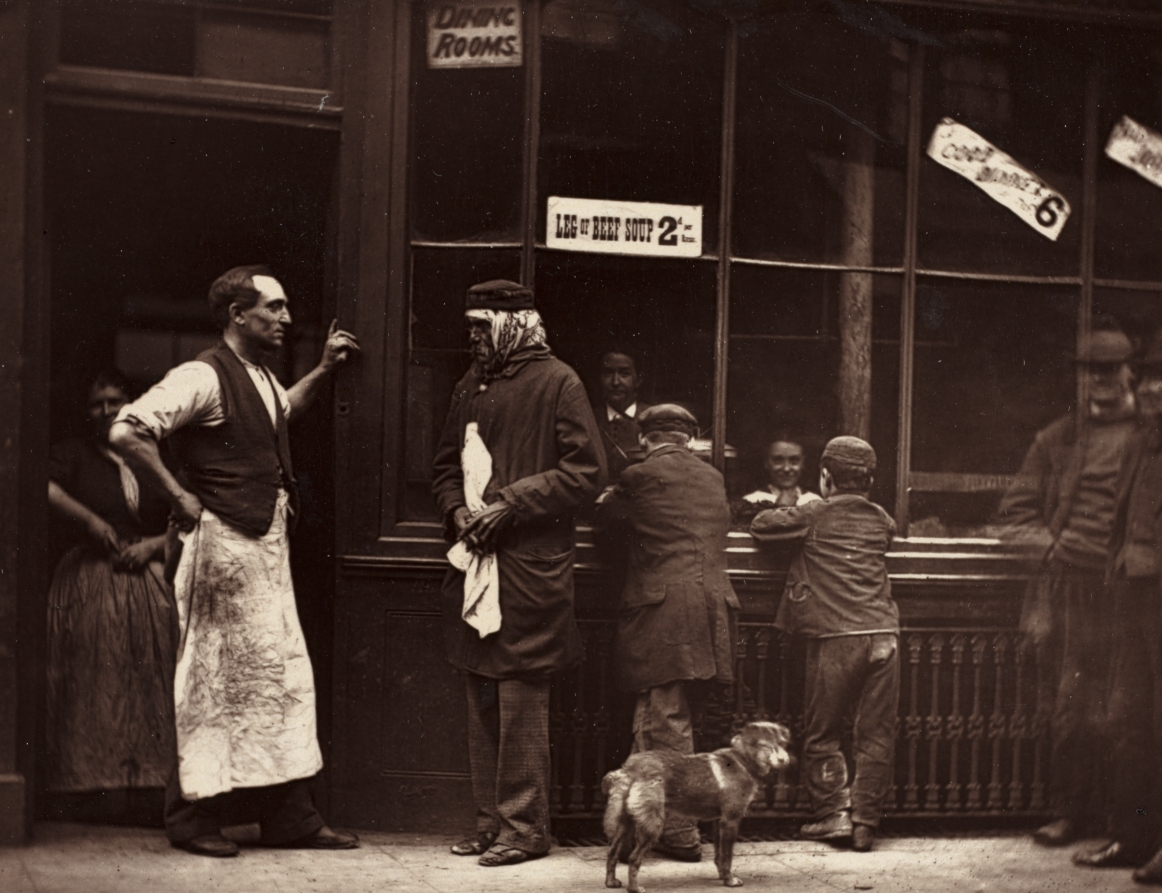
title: A Convict's Home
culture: England, 19th century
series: Street Life in London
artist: John Thomson (Scottish, 1837–1921)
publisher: Sampson Low, Marston, Searle and Rivington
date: 1876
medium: woodburytype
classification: Photograph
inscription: Written in pencil on recto: "300"; in red ink on recto: "A Convict's Home"